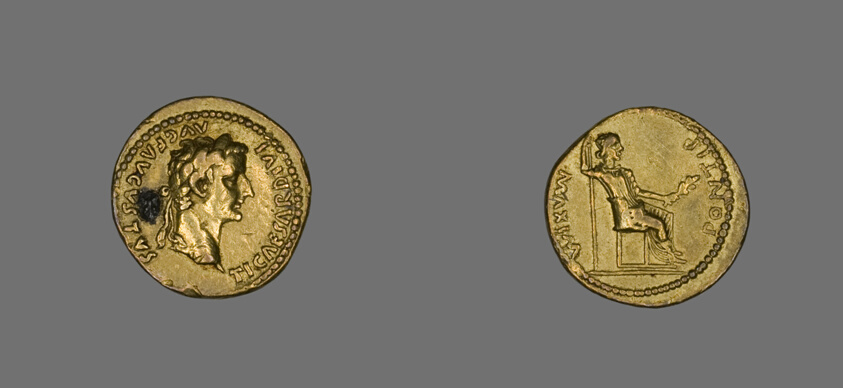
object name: Coin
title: Aureus (Coin) Portraying Emperor Tiberius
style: imperial (roman), ancient, roman (ancient, style or period)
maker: Roman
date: 14-37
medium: Gold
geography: Roman Empire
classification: coin; ancient art; struck